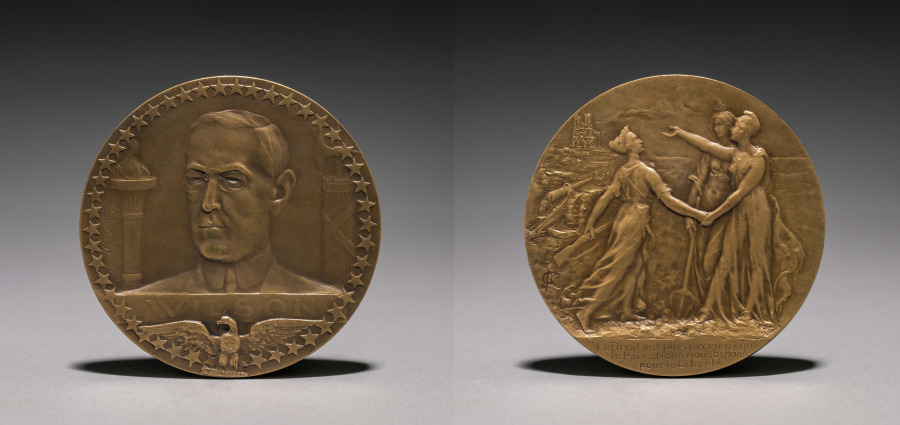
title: Medal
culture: France, 20th century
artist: René Grégoire (French, 1871–1945)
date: 1914–1918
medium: bronze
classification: Metalwork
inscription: "Wilson."